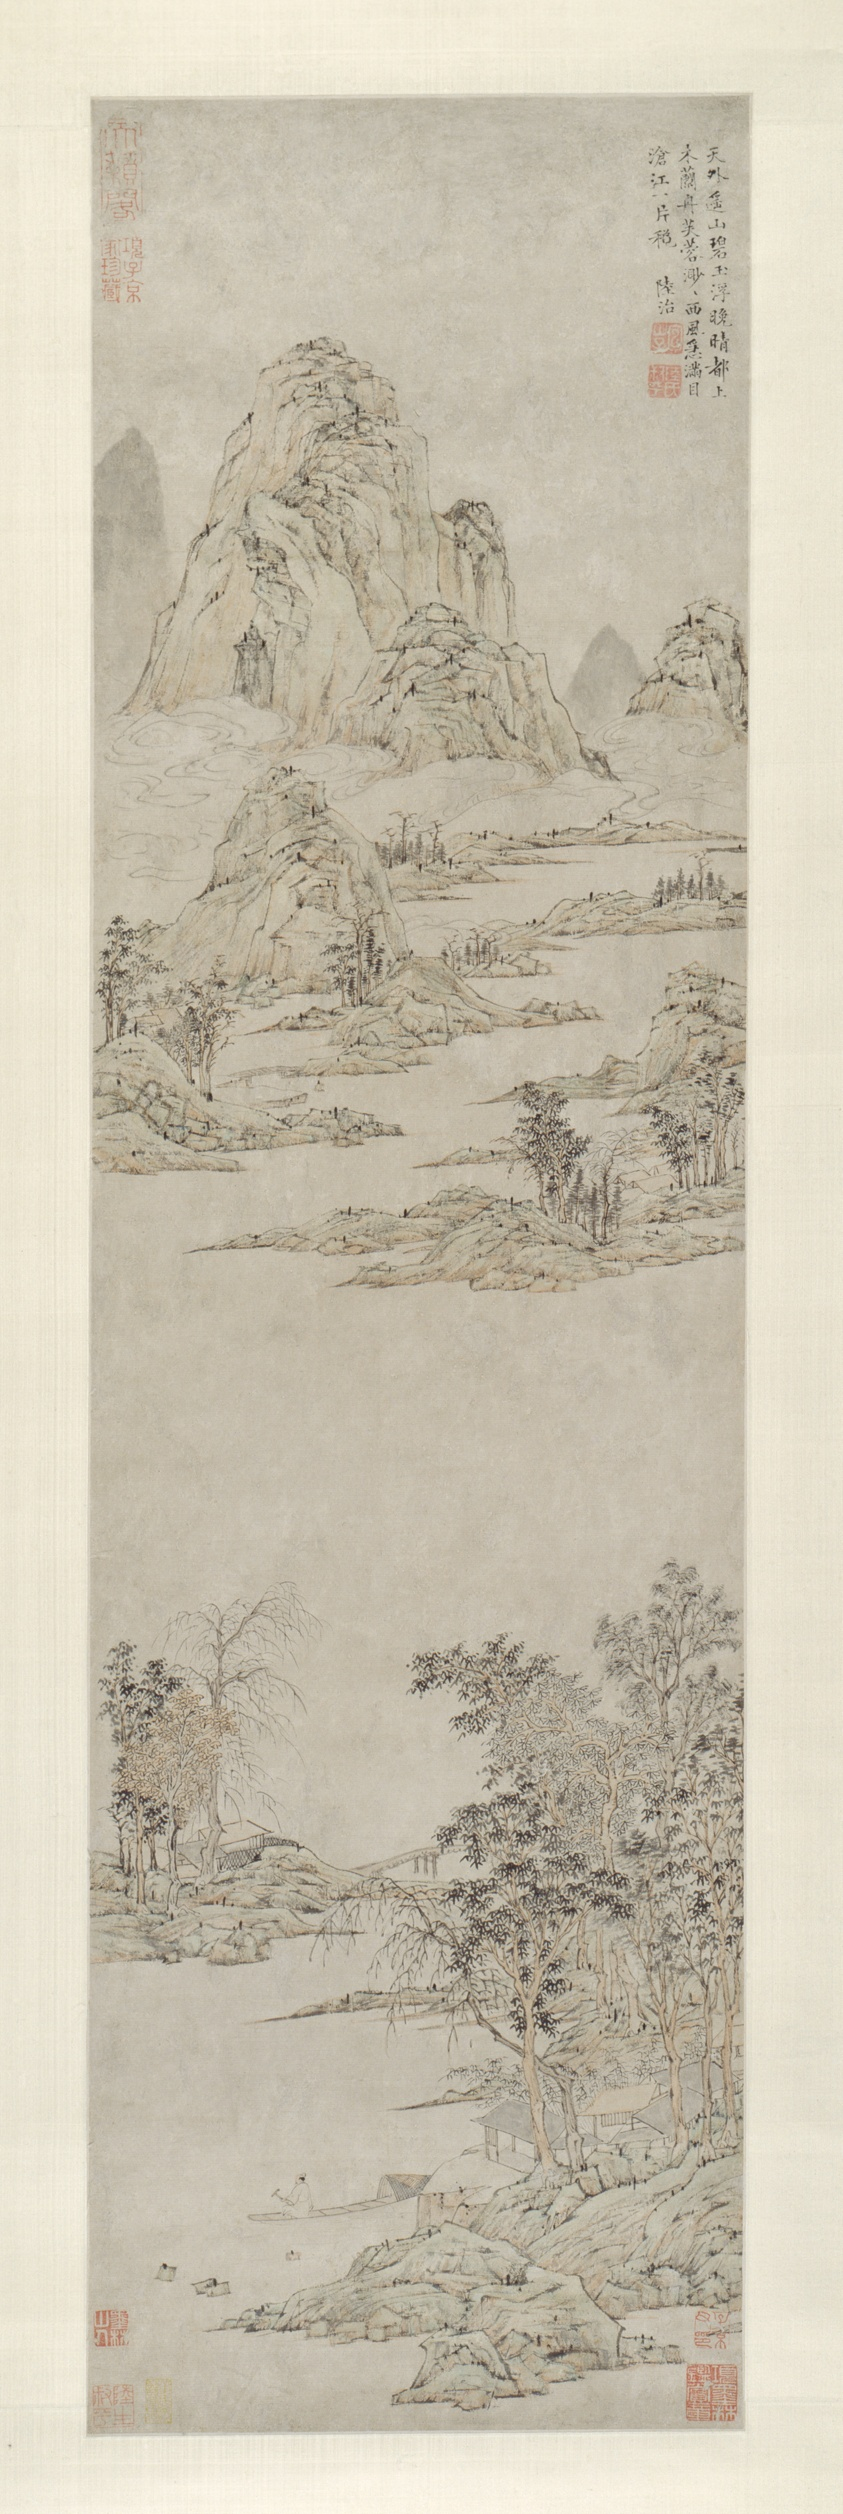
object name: Painting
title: Pulling Oars under Clearing Autumn Skies 晴秋涉櫂圖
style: Chinese (culture or style)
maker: Lu Zhi 陸治 (Chinese, 1496-1576)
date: Ming dynasty (1368–1644); c. 1545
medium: Hanging scroll; ink and color on paper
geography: China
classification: hanging scroll; painting; asian art